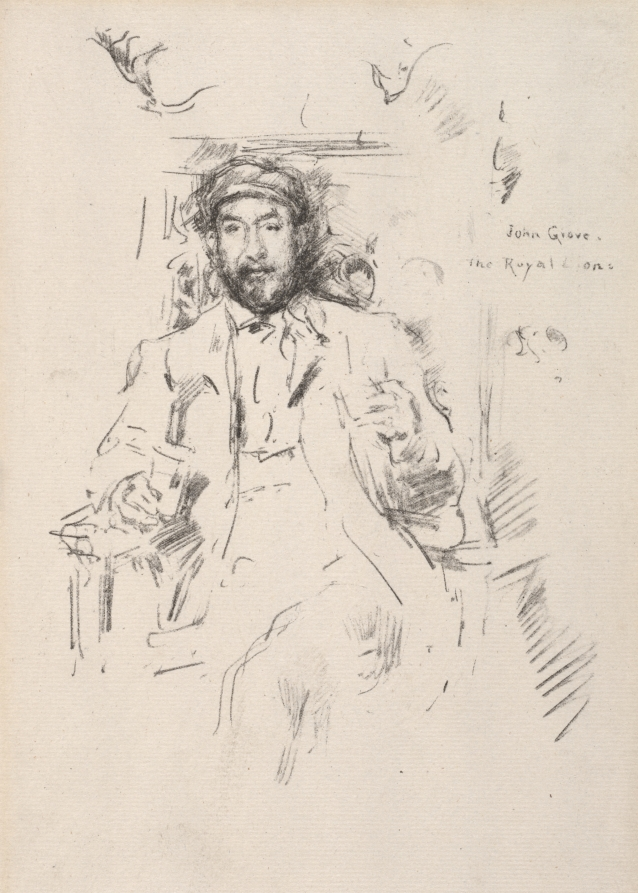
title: John Grove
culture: America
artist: James McNeill Whistler (American, 1834–1903)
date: 1895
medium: lithograph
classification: Print